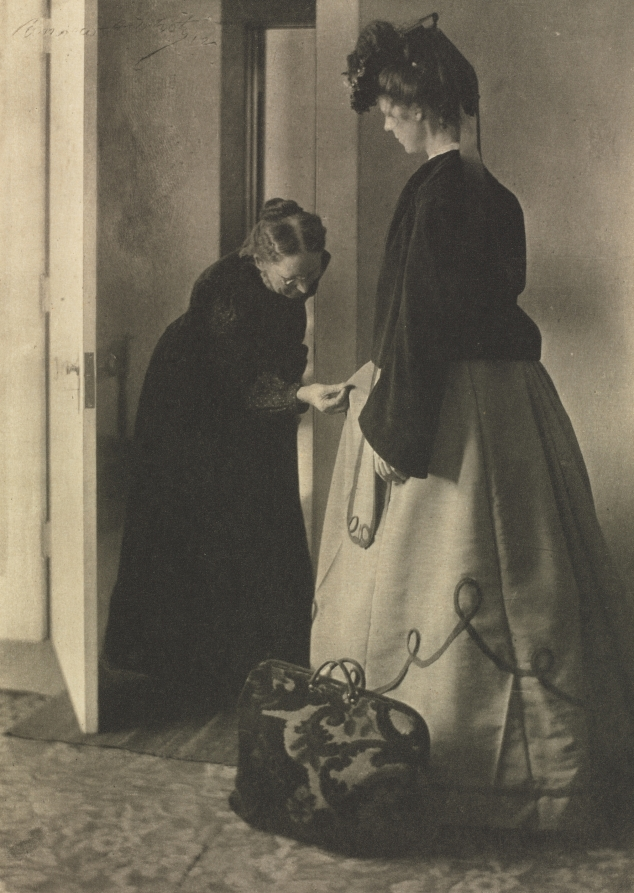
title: Camera Work: Illustration to "Eben Holden"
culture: America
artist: Clarence H. White (American, 1871–1925)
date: 1905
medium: photogravure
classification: Bound Volume